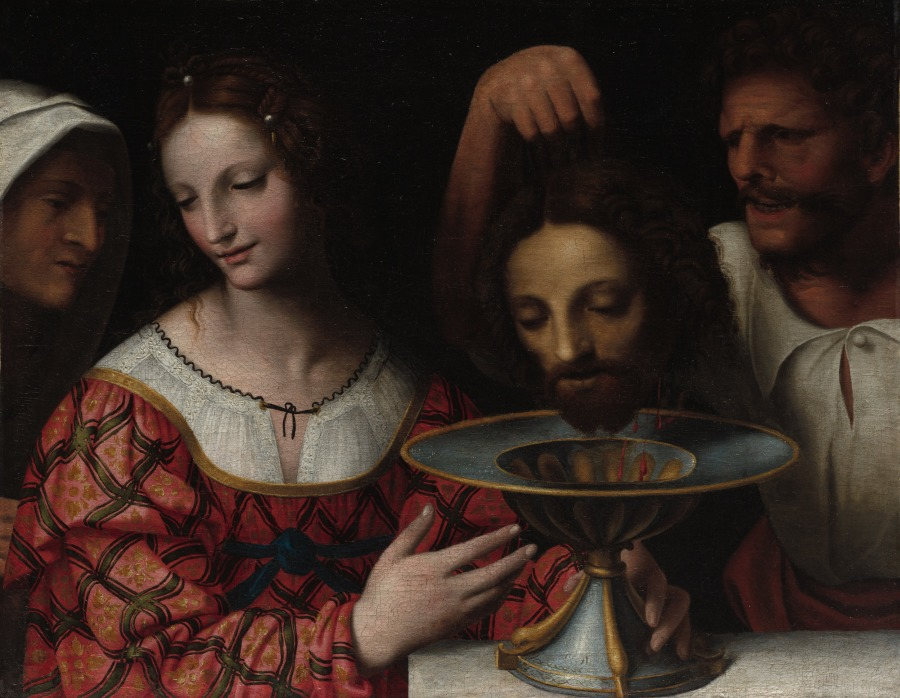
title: Salome with the Head of Saint John the Baptist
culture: Italy, Milan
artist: follower of Bernardino Luini (Italian, c. 1480-c. 1532)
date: 1500s or later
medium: oil on canvas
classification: Painting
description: Salome’s dancing so pleased her stepfather Herod that he offered her anything she wanted. Her mother advised Salome to demand John the Baptist’s head, which Salome presented to her family on an elaborate dish. Despite its biblical source, this work was meant for a domestic setting, whose owner would have admired the elegant presentation of a shocking story.